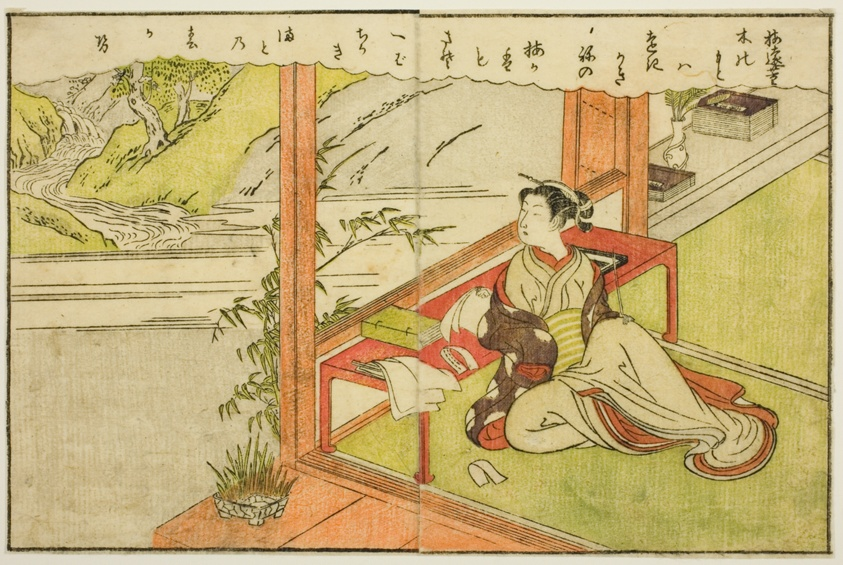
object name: Print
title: Double-page Illustration from Vol. 2 of "Picture Book of Spring Brocades (Ehon haru no nishiki)"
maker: Suzuki Harunobu 鈴木 春信; Japanese, 1725 (?)-1770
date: 1771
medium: Color woodblock print; double-page illustration from book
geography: Japan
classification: woodblock print; print; asian art